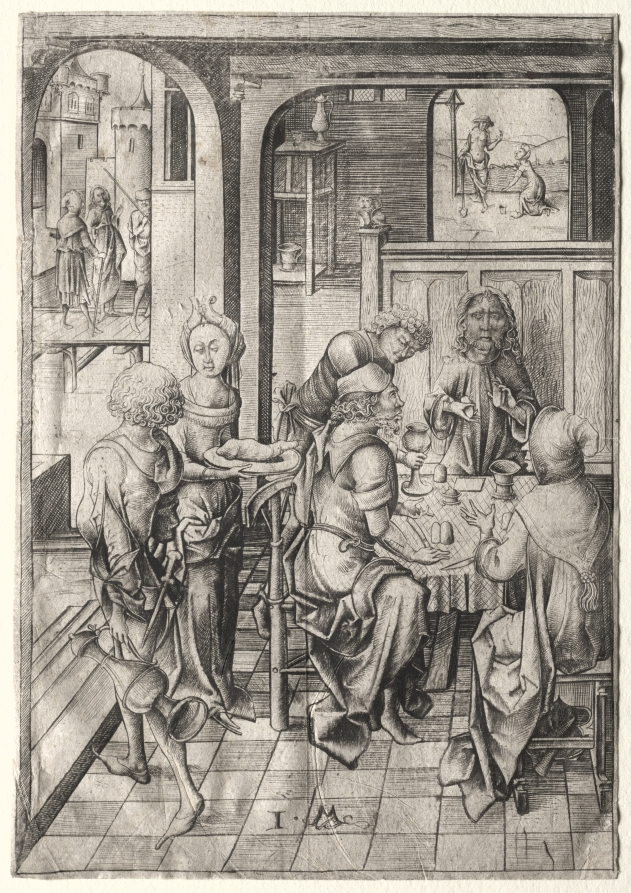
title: Supper at Emmaus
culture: Germany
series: The Passion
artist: Israhel van Meckenem (German, c. 1440–1503)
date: c. 1480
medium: engraving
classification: Print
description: In the New Testament, the Supper at Emmaus takes place after Christ’s Resurrection, when two of his apostles invite him—whom they suppose is a pilgrim and stranger—to dine with them. Israhel van Meckenem staged the scene at an inn, where the three are served food and drink. Christ breaks the bread and blesses it, a gesture that reminds the two disciples of the Last Supper. They thus recognize Christ as their resurrected savior. Van Meckenem contrasted the knowing eyes and gestures of the disciples with the indifferent actions of the servants who carry and pour the wine.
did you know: Artists often use views through rooms to create a sense of perspective. Here, this technique allows the viewer to follow Christ from the garden, to the bridge, and into the inn.